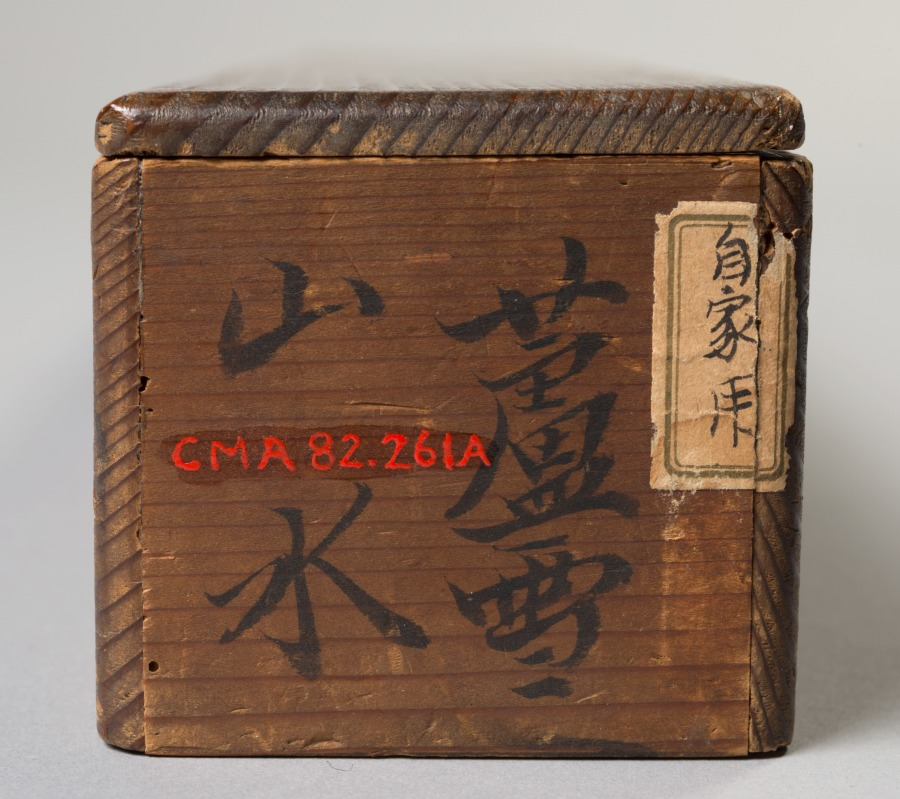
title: Mountains and Distant Boats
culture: Japan, Edo period (1615–1868)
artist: Nagasawa Rosetsu (Japanese, 1754–1799)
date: late 1700s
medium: hanging scroll; ink and slight color on paper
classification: Painting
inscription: Signed: 蘆雪; Sealed: 引裾